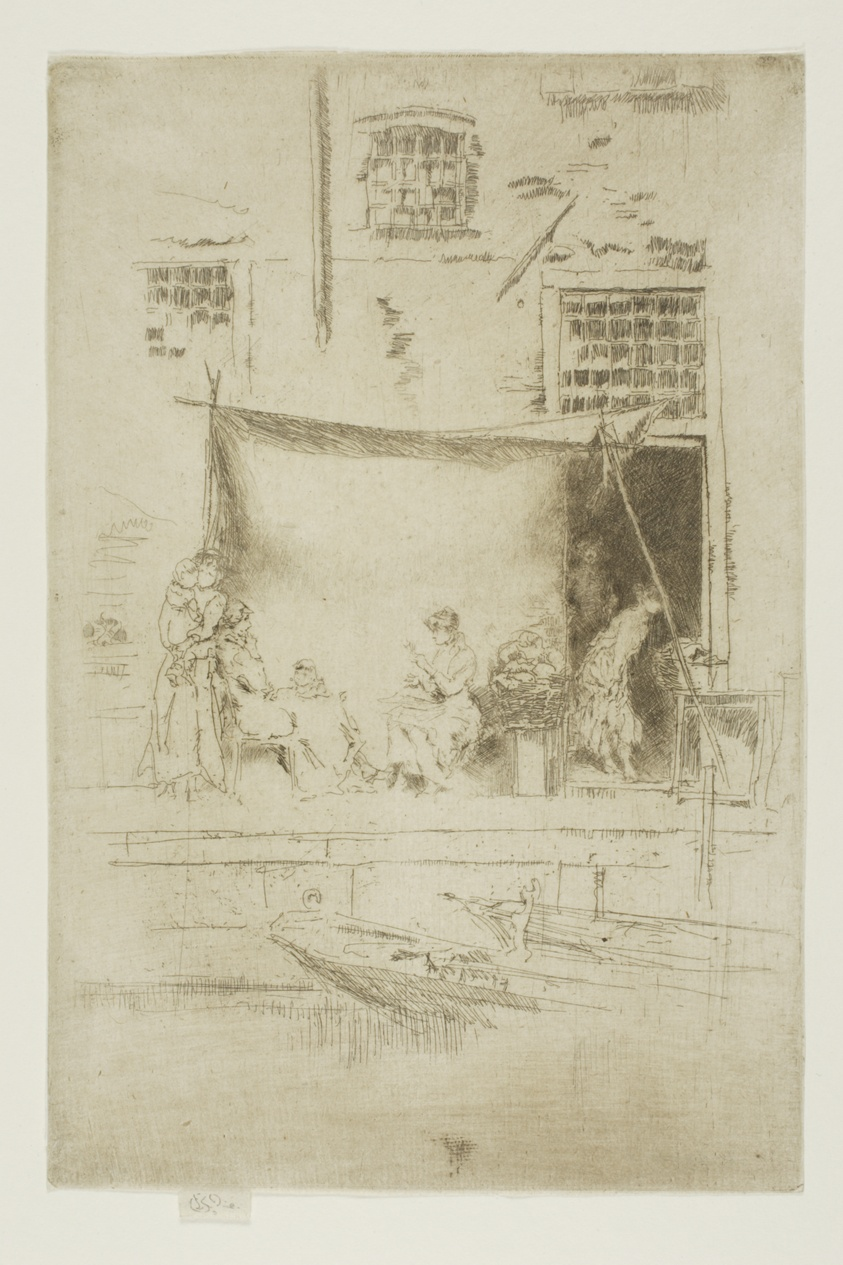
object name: Print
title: Fruit Stall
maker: James McNeill Whistler (American, 1834-1903)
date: 1879/80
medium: Etching and drypoint with foul biting in dark brown ink on ivory laid paper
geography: United States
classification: etching; drypoint; foul biting; print; prints and drawing; paper